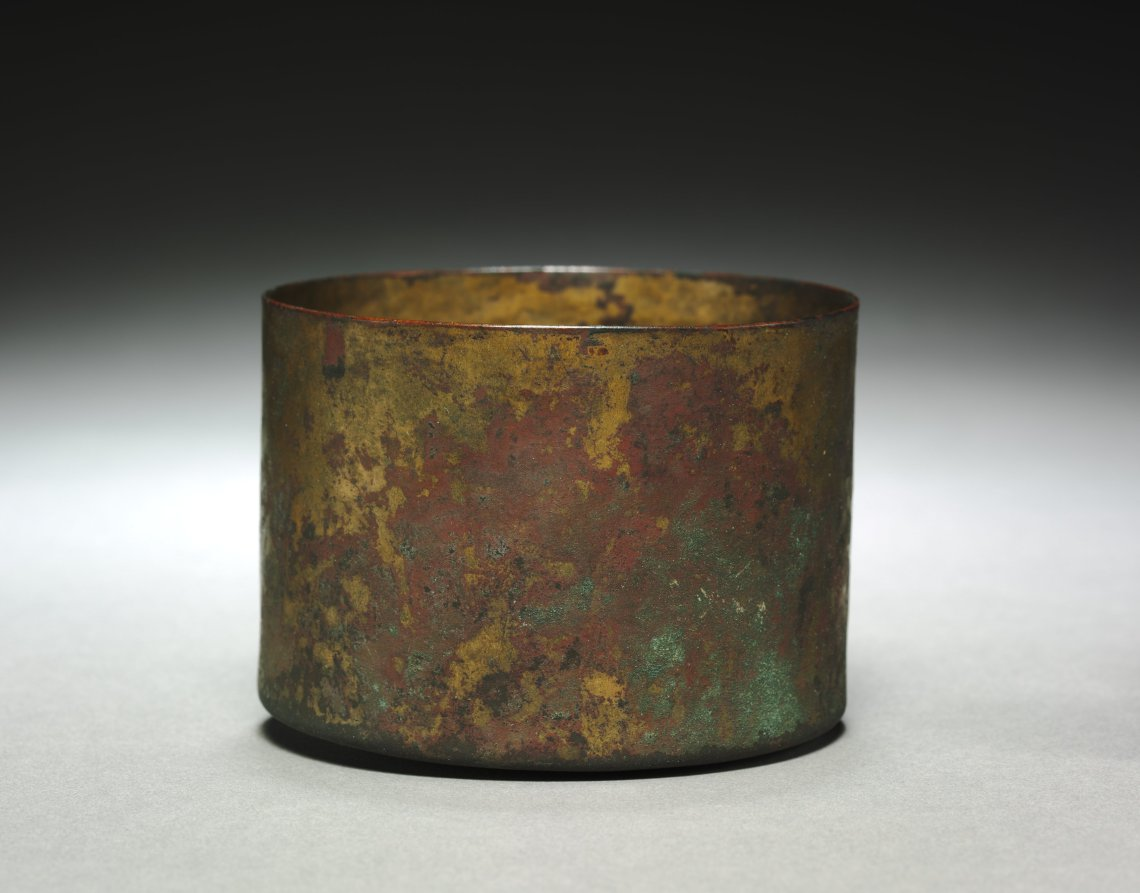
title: Cylindrical Bowl or Jar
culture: Egypt, Roman Empire or modern forgery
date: 30 BCE–395 CE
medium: bronze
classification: Vessels